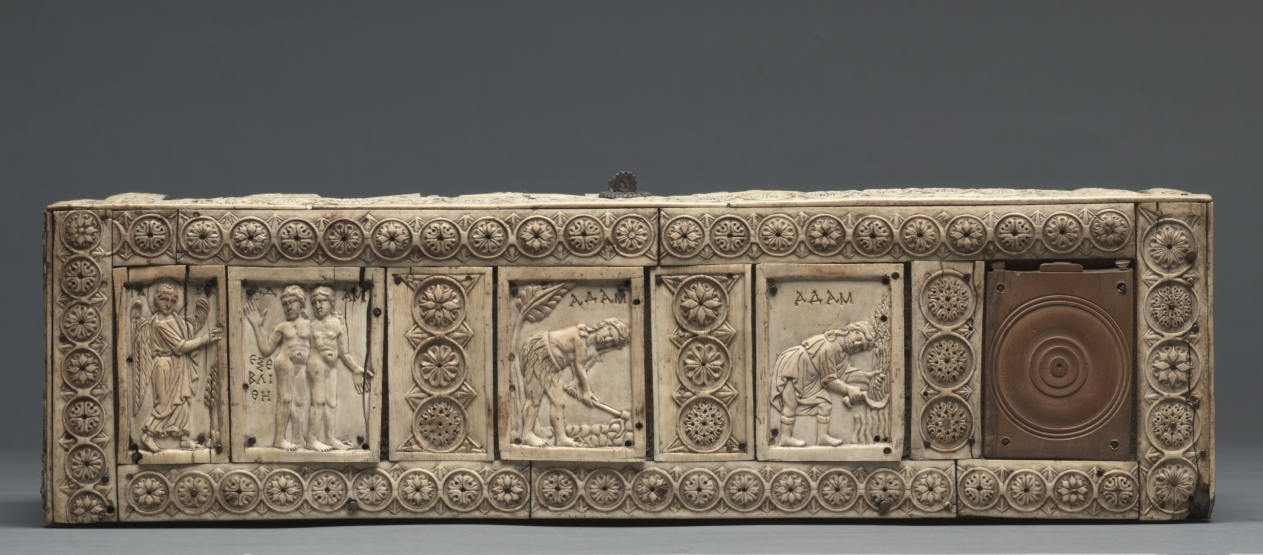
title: Ivory Box with Scenes of Adam and Eve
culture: Byzantium, Constantinople, Byzantine period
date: 1000–1100s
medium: ivory, wood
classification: Ivory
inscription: Greek inscriptions are included in each plaque.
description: Scenes from the Old Testament stories of Adam and Eve and their children, Cain and Abel, decorate this box, which may have been made to contain jewelry or small valuables. On its lid two plaques depict the creation of Adam and the creation of Eve from Adam’s rib. Two further plaques depict Cain slaying Abel: Cain throws a stone in the direction of Abel, who is hit by stones in the hip, chest, and head.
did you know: Carved out of imported ivory by skilled craftsmen, boxes such as these were used by Byzantine elites to store luxury goods such as jewelry.